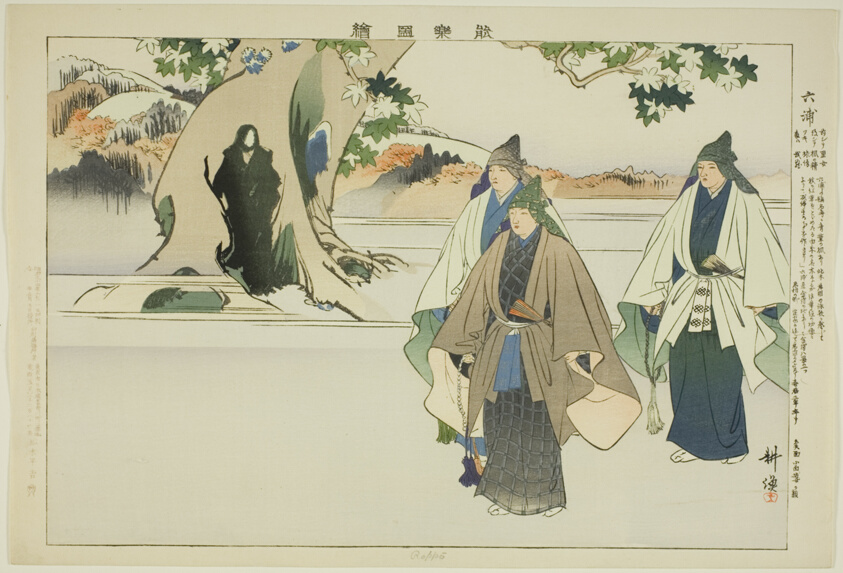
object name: Print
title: Roppo, from the series "Pictures of No Performances (Nogaku Zue)"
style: Japanese (culture or style)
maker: Tsukioka Kogyo; Japanese, 1869-1927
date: 1898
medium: Color woodblock print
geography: Japan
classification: woodblock print; print; asian art